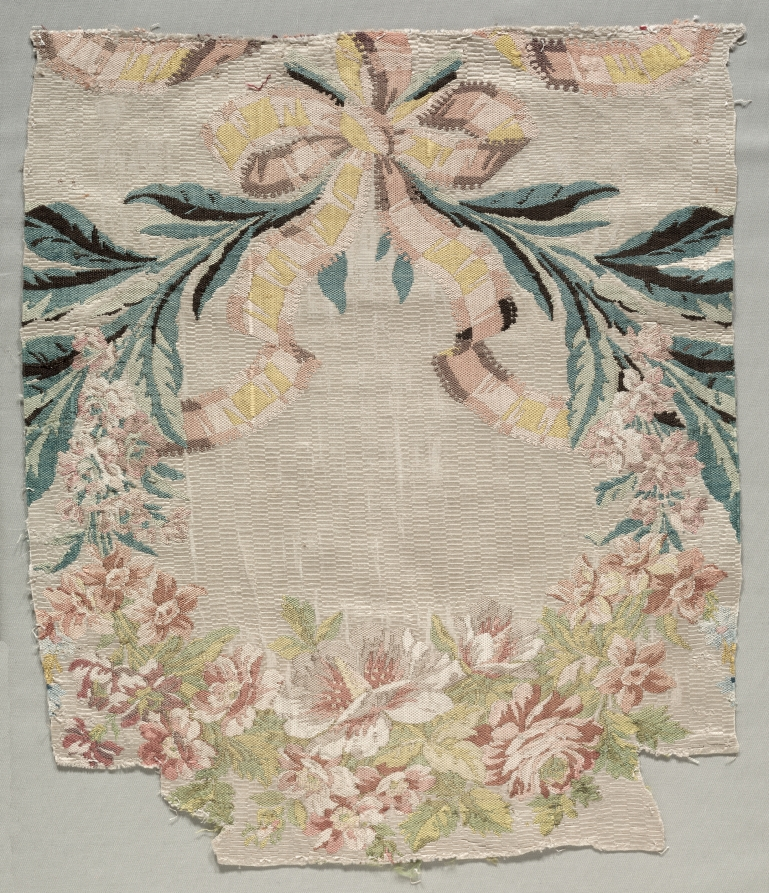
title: Silk Fragment, Part of Panel called "Le panier fleuri"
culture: France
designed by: Philippe de Lasalle (French, 1723–1805)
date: 1770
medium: brocade, silk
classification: Textile